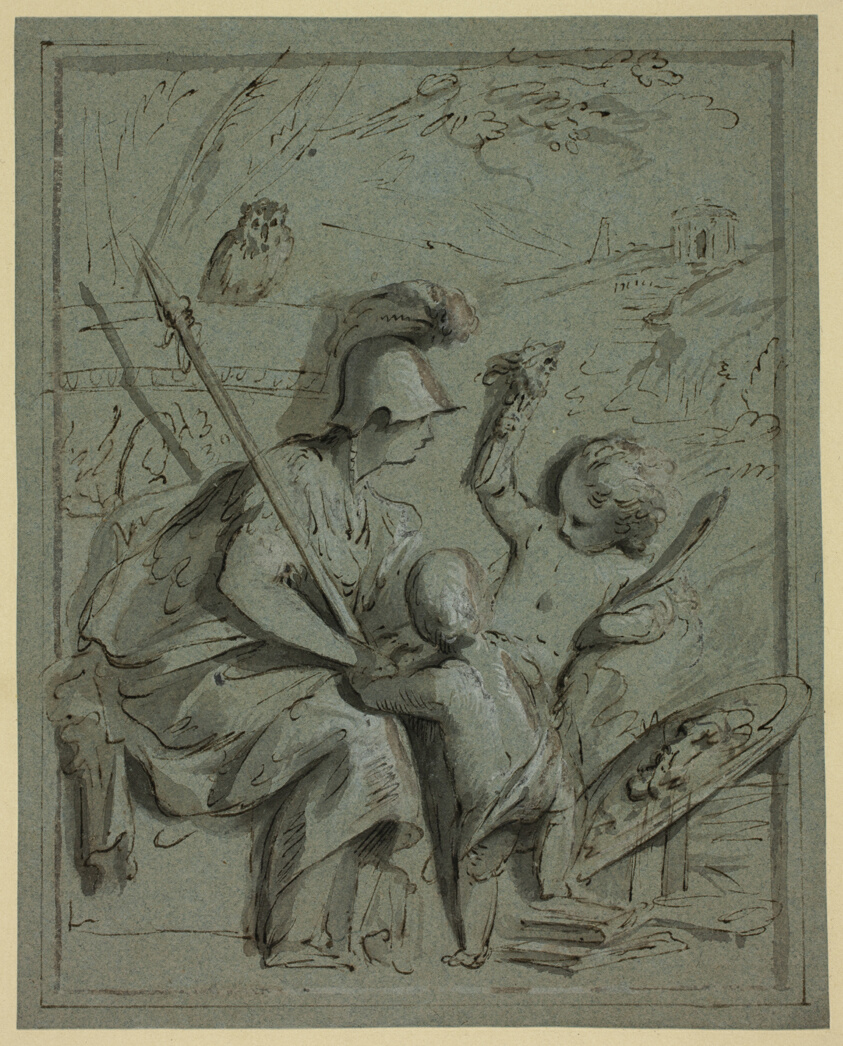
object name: Drawing and Watercolor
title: Minerva with Two Putti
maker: Jacob de Wit (Dutch, 1695-1754)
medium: Pen and brown ink with brush and gray wash, heightened with lead white (partly discolored), on blue laid paper, laid down on card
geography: Holland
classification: pen and ink drawings; drawings (visual works); prints and drawing